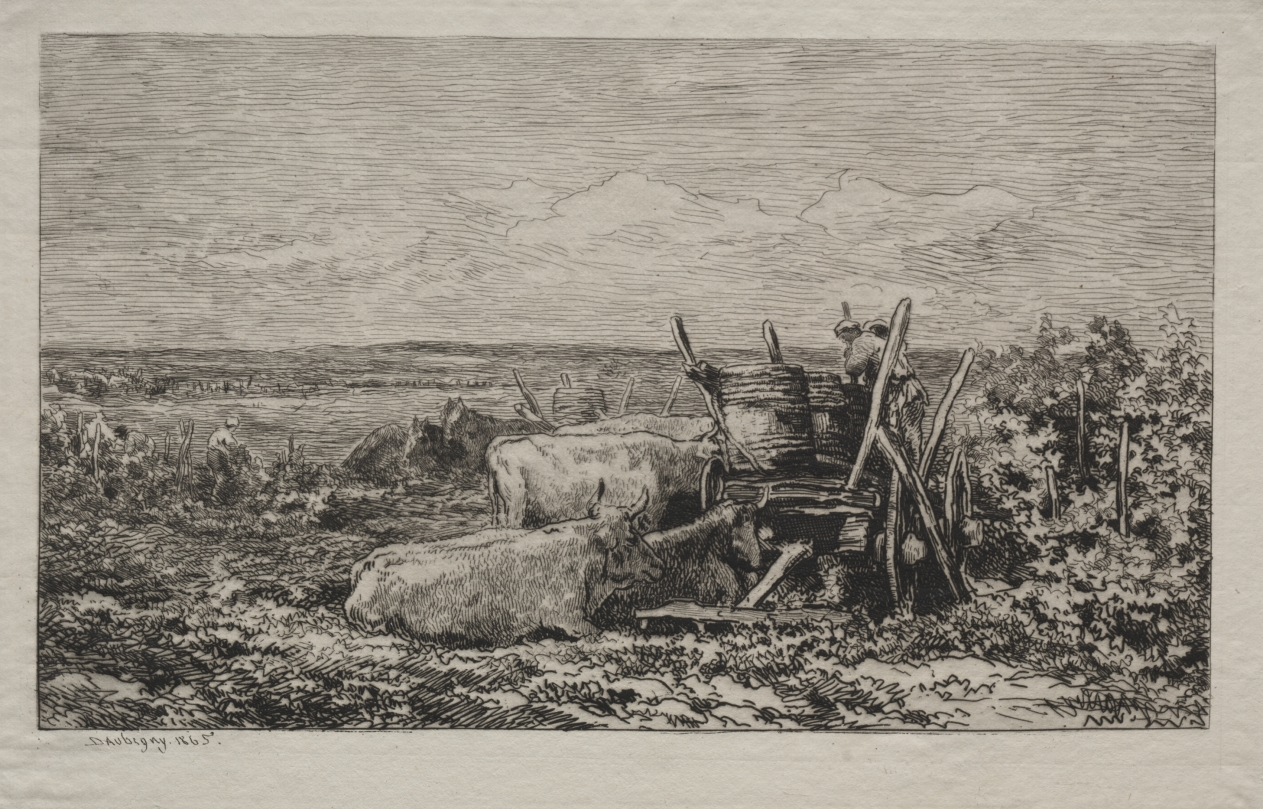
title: The Grape Harvest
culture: France, 19th century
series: Published L'Album of la Société des Aquafortistes in May, 1865.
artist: Charles François Daubigny (French, 1817–1878)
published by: Alfred Cadart (French, 1825–1875)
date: 1865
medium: etching and drypoint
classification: Print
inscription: signed, lower left, in plate: Daubigny 1865